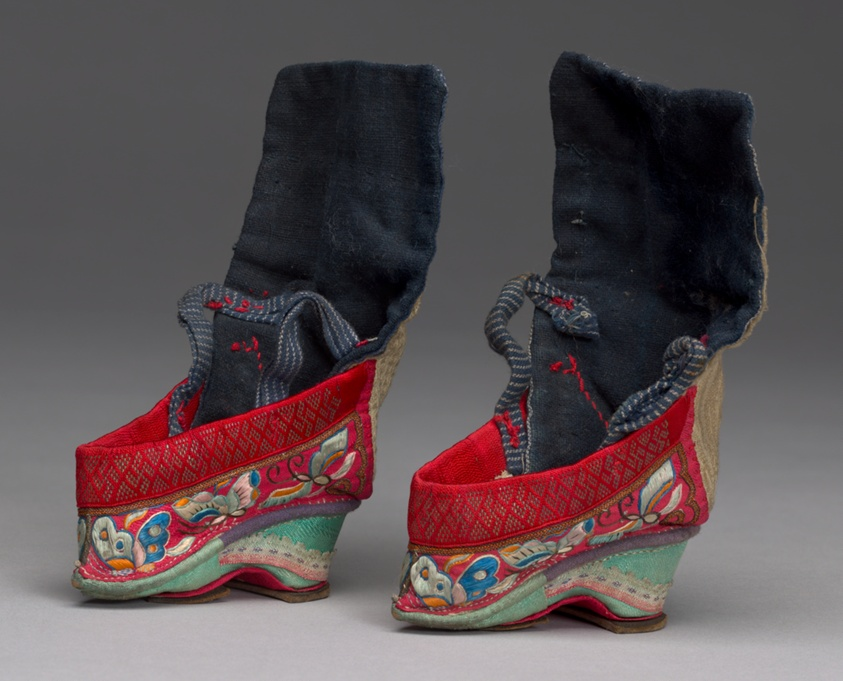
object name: Costume and Accessories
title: Children's Shoes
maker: China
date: Qing dynasty (1644–1911), late 18th/early 19th century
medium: Silk, satin weave, with needlework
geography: China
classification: textile; shoes - needlework; costume accessory - shoe; costume